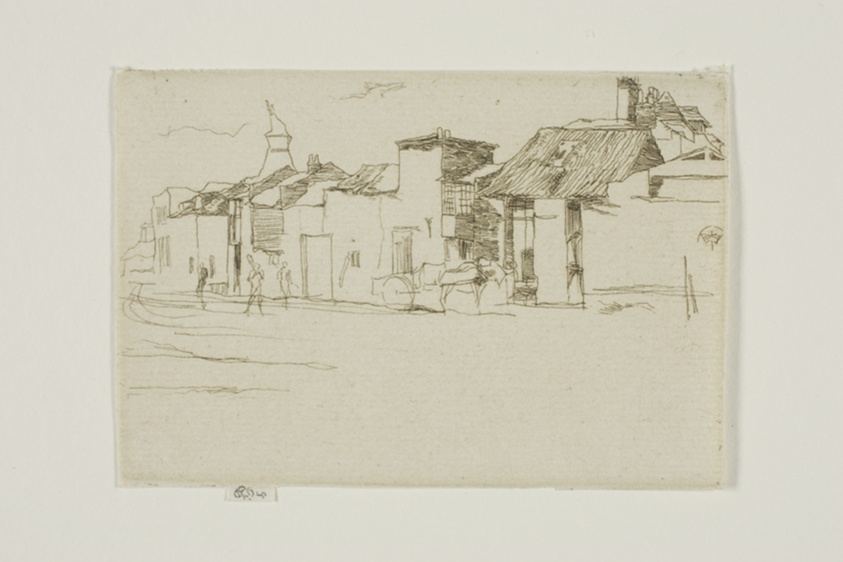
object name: Print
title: The Old Swan Brewery, Chelsea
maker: James McNeill Whistler (American, 1834-1903)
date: 1872/73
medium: Etching in dark brown ink on ivory laid paper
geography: United States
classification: etching; print; prints and drawing; paper